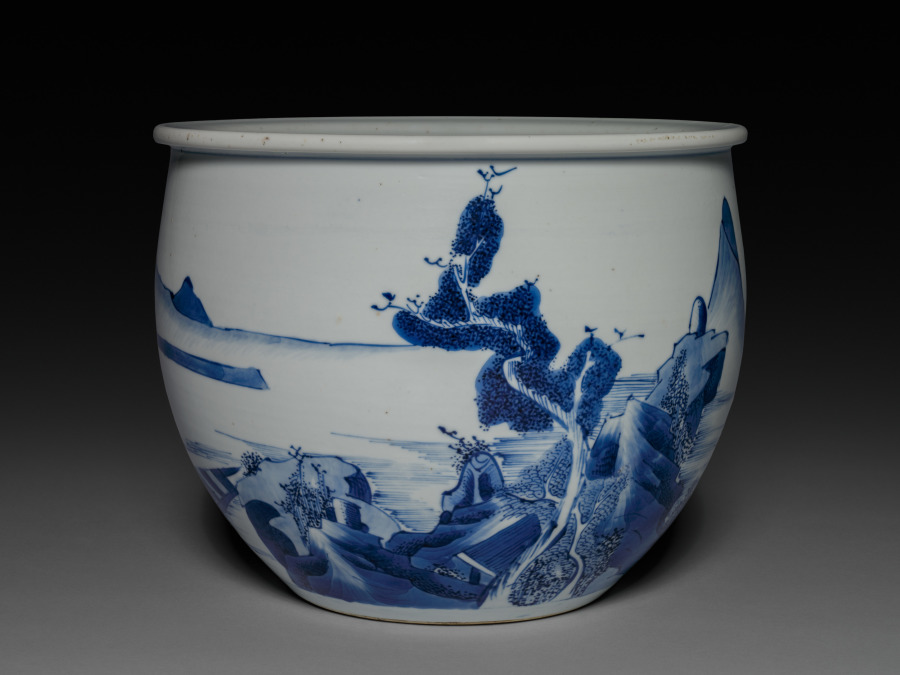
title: Pot with Landscape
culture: China, Jiangxi province, Jingdezhen kilns, Qing dynasty (1644-1911), Kangxi reign (1662-1722)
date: 1662–1722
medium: porcelain with underglaze blue decoration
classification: Ceramic